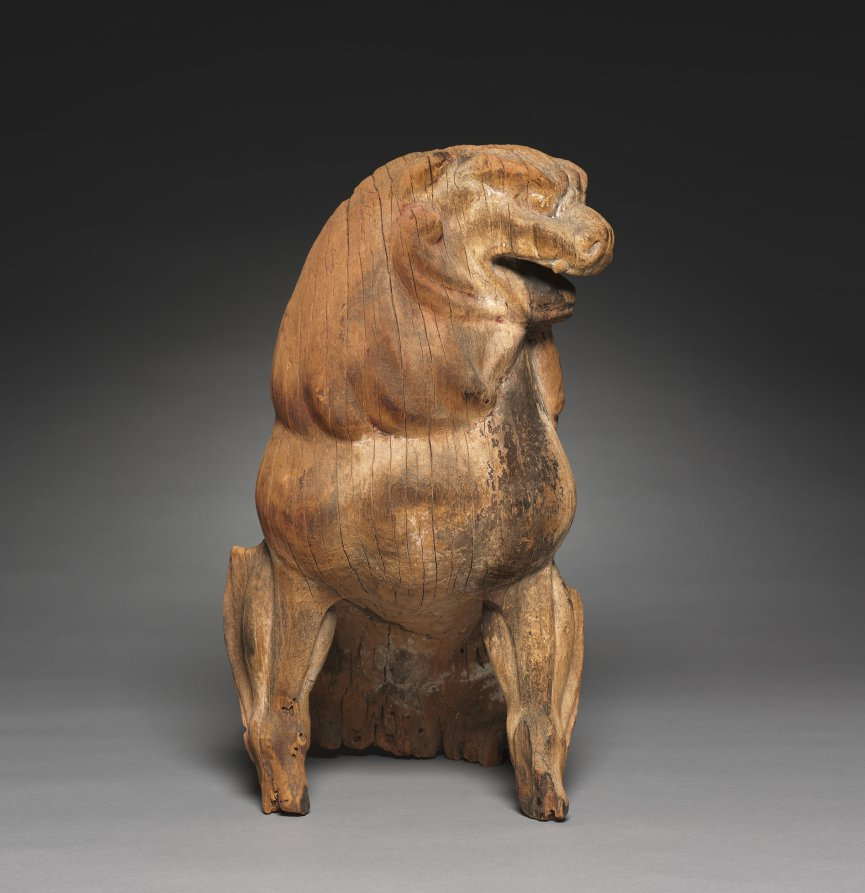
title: Guardian Animal: Karashishi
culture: Japan, Kamakura period (1185–1333)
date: 1300s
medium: Wood with traces of color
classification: Sculpture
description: Placed at the entrance to shrines and temples in Japan, guardian figures ward off evil spirits. These guardians used to be painted red and white and are distinguishable by their facial expressions: the open-mouthed animal is a karashishi, or “Chinese lion,” while the close-mouthed beast, which once had a single horn protruding from its head, is called a komainu, or “Korean dog.” The mouths correspond to infinity, the syllables ah (open) and um (closed), or the alpha and omega. This pairing was widespread in ancient times in Chinese territories and likely found its way to Japan via kingdoms in Korea.